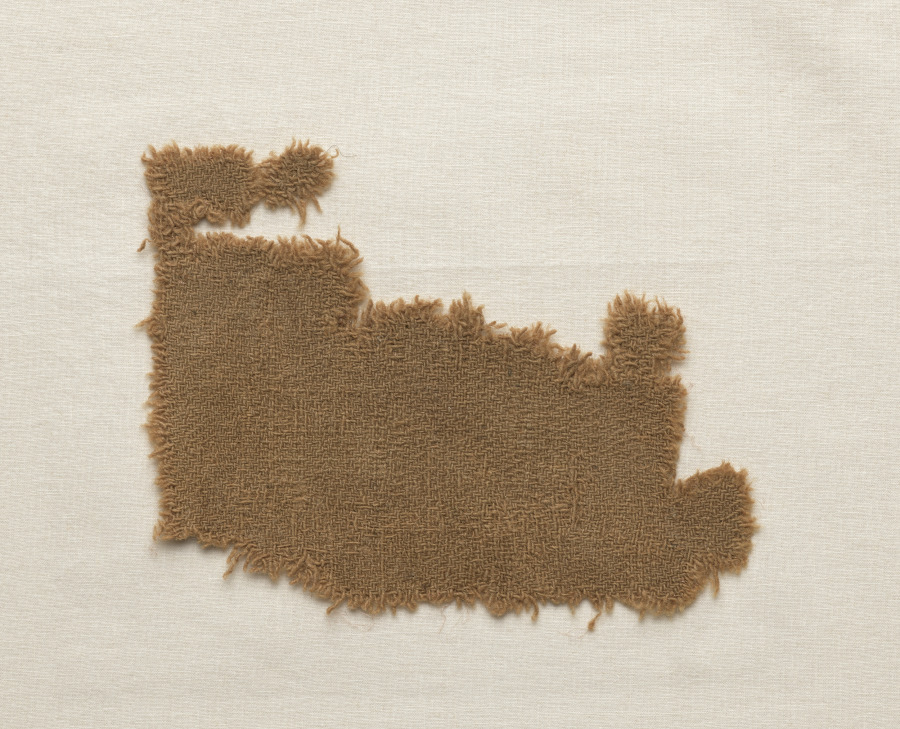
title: Wool Fragment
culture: Syria, Dura-Europos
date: 200s CE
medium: wool: 2-2 twill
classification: Textile